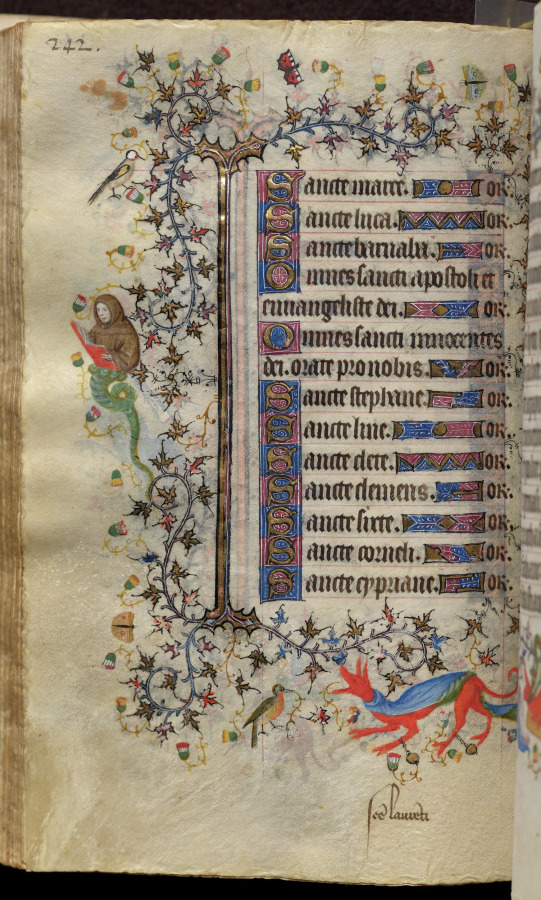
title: Hours of Charles the Noble, King of Navarre (1361-1425): fol. 121v, Text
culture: France, Paris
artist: Master of the Brussels Initials and Associates (French)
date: c. 1405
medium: ink, tempera, and gold on vellum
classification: Bound Volume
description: This precious volume was obviously highly prized by its owner, the French-born King of Navarre, who had his coat of arms painted on no less than twenty folios. Rather than directly commissioning this manuscript from a specific workshop, it seems that Charles the Noble acquired his book of hours -- perhaps ready-made for the luxury market -- while on a trip to Paris in 1404-05. A collaborative effort, six painting styles are evidenced within the pages of this codex, those of two Italians, two Frenchmen, and two Netherlanders. The painter who was responsible for the planning and decoration of the book, and who produced seventeen of the large miniatures, was a Bolognese artist known as the Master of the Brussels Initials. His principal assistant, responsible for most of the borders, was a Florentine who signed his name "Zecho" da Firenze on folio 208 verso.